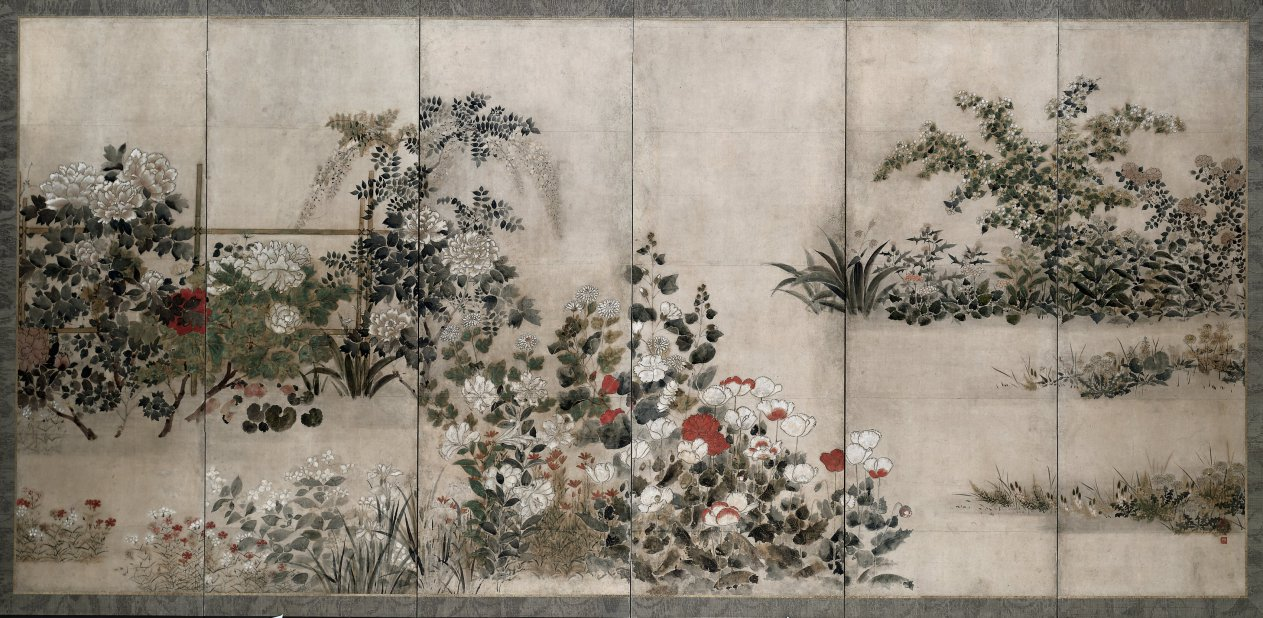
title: Flowers and Grasses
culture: Japan, Edo period (1615–1868)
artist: Kitagawa Sōsetsu (Japanese, active 1639–50)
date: mid-1600s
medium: One of a pair of six-panel folding screens; ink and color on paper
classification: Painting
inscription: two seals, lower right: "I-nen; Sosetsu"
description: Kitagawa Sōsetsu painted for the Maeda family, powerful rulers of what is present-day Ishikawa Prefecture on the central northern coast of Honshū, Japan’s main island. Screens served as room dividers and backdrops in Maeda grand residences. This composition is considered one of the artist’s masterpieces. Kitagawa Sōsetsu is thought to have been a student of Tawaraya Sōsetsu, who was in turn the student of Tawaraya Sōtatsu, the Kyoto-based master painter regarded as the creator of the style that came to be known as Rinpa. By selecting a painter of this lineage, the Maeda family consciously connected their aesthetics to those of the imperial capital as a means of proclaiming their elevated status.